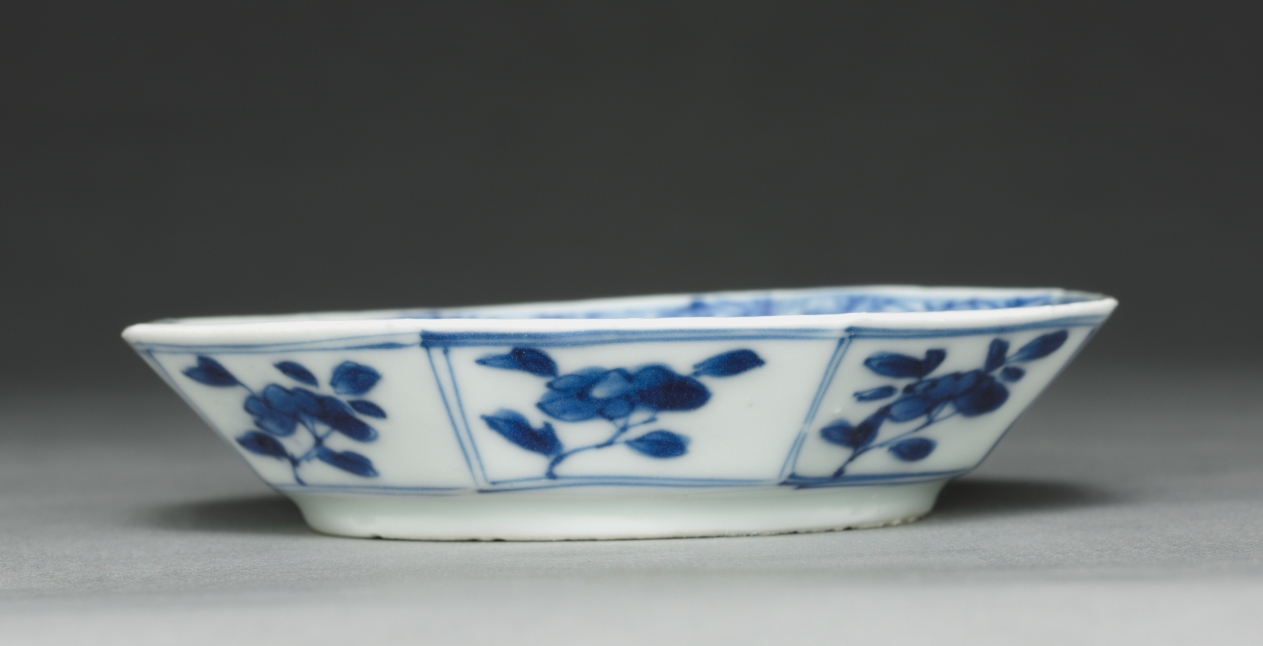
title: Saucer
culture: China, Qing dynasty (1644-1911)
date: c. 1690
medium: porcelain with blue and white decoration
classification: Ceramic